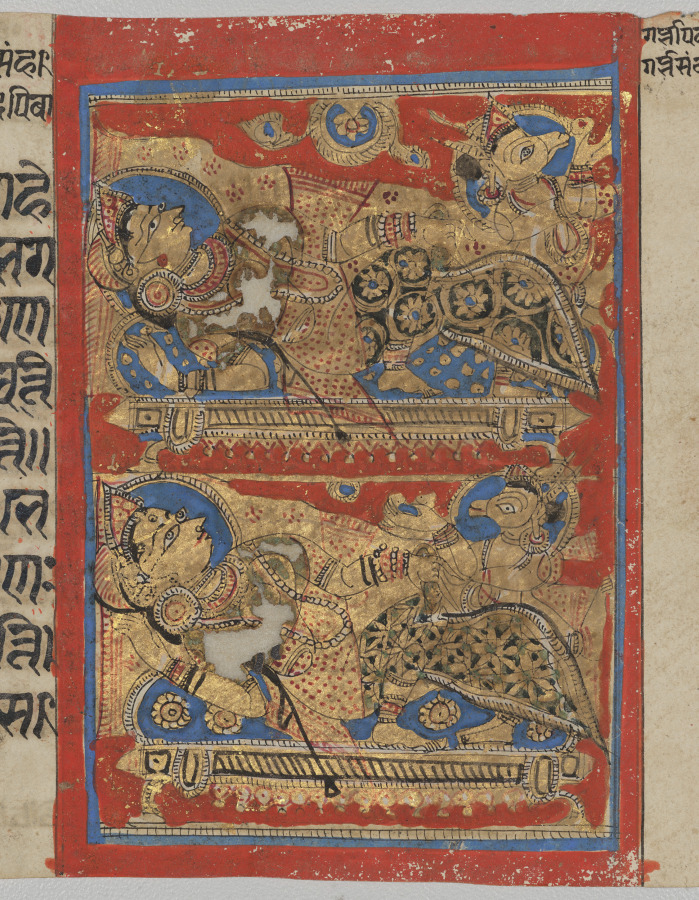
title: Transfer of the Embryo of Mahavira, Folio 12 (recto), from a Kalpa-sutra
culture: Western India, Gujarat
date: c. 1475–1500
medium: Gum tempera, ink, and gold on paper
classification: Painting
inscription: [[upper right]] garbhāpahāra/garbhasaṃvaraṇa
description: The tiny captions written in Sanskrit to the right of the painting identify the subject of this scene: “abduction of the embryo” and “transfer of the embryo.” The embryo is the unborn founder of the Jain religion. In this miraculous episode, a goat-headed divinity who presides over miscarriage and childbirth gently takes the embryo in his cupped hands away from the reclining Brahmin lady in the scene above. Below, he carries it to a queen, who will be the birth mother.